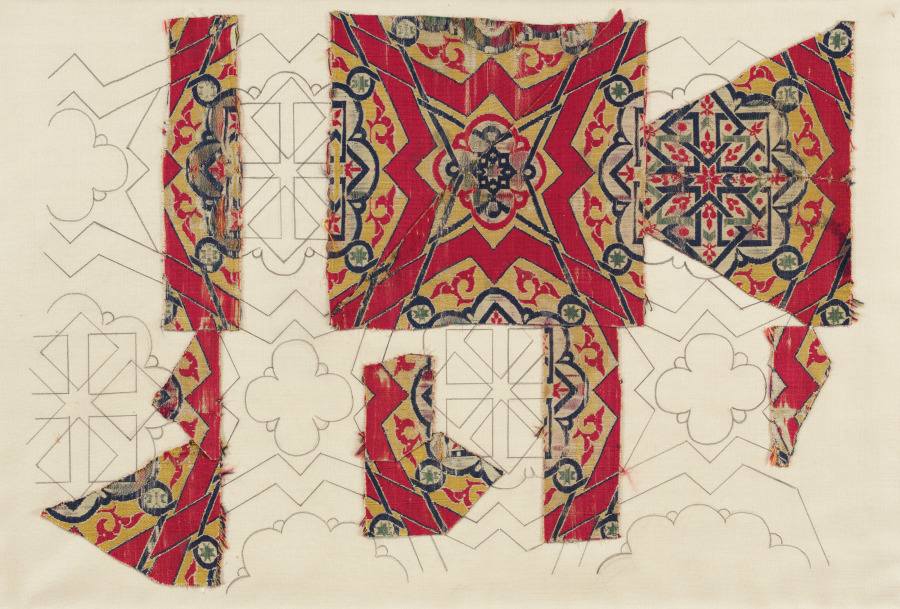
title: Fragment of Silk Brocade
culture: Spain, Islamic period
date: 14th-16th century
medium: lampas weave, silk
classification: Textile